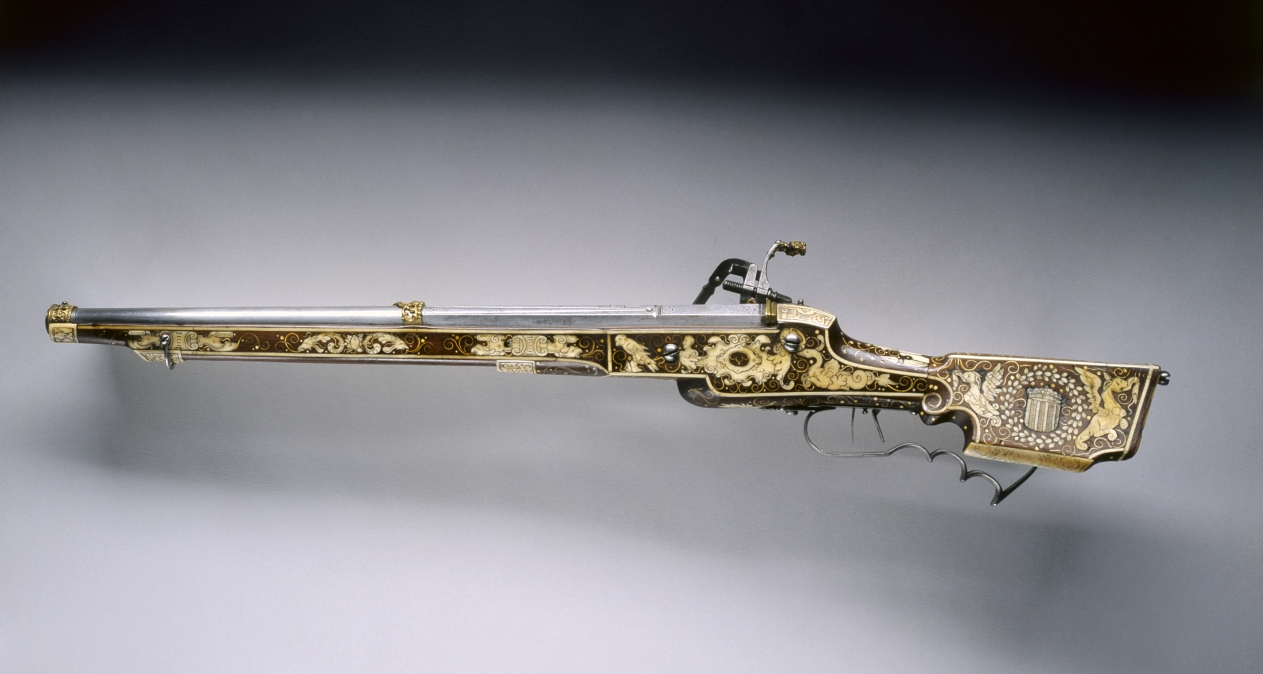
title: Wheel-Lock Rifle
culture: Germany, Bavaria (?), 17th century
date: 1618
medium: steel, brass, walnut stock inlaid with bone, horn and ivory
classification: Arms and Armor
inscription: on barrel: 1618, S.H.; on stock: FF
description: Made originally as a petronel pistol, this firearm seems to have been refitted with a new stock sometime during the 17th century to convert it into a rifle, most likely for a child's use.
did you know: The artisan who made this rifle used brass, bone, horn, and ivory to create decorative elements like animals involved in the hunt, fruits, and other details. If you look beneath the gun, you will see a goose or duck and a vase of flowers near the trigger.